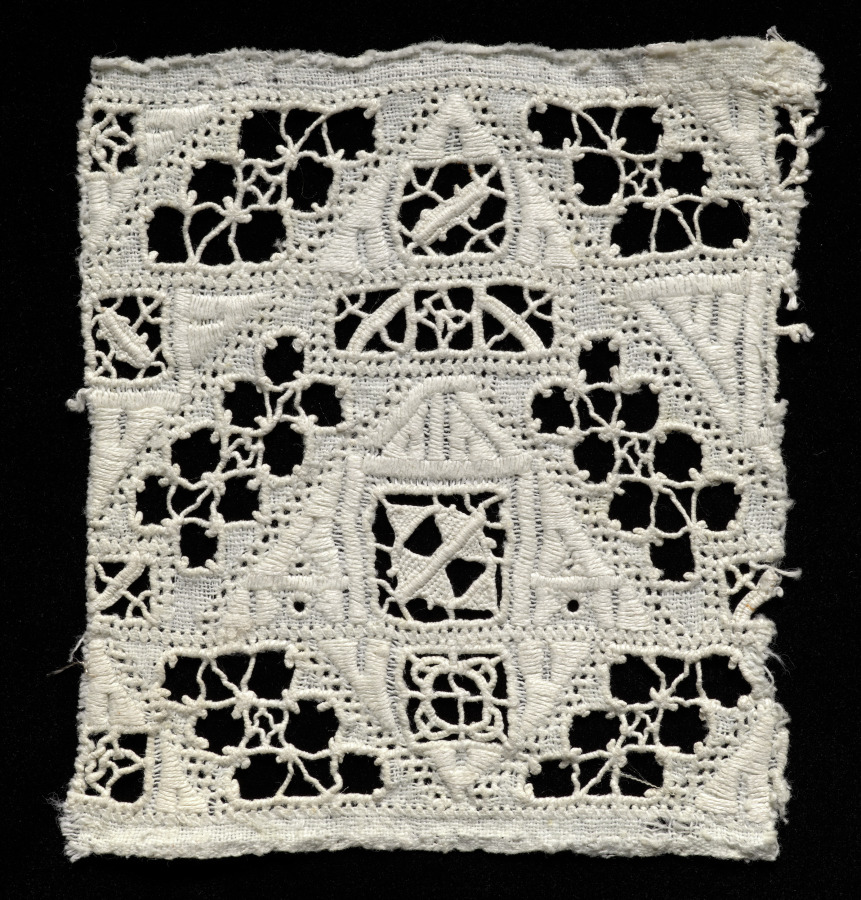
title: Lace Fragment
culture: Italy, 1800s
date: 1800s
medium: Linen: needle lace (cutwork) and bobbin lace edging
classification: Lace